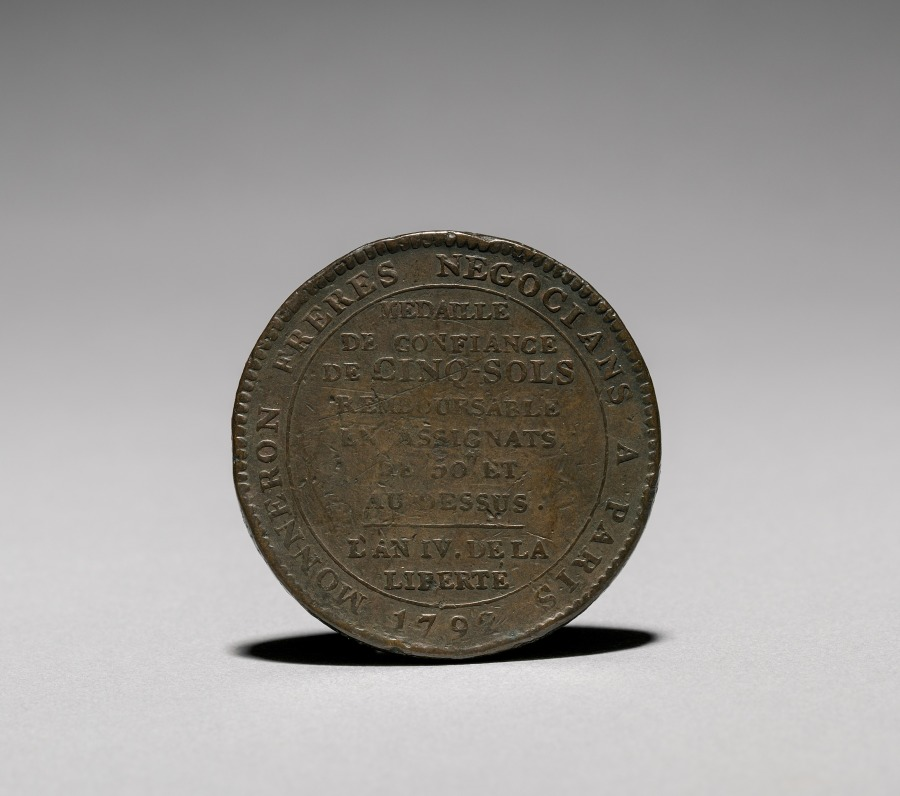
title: Medal: Five Sols issued by Monneron Brothers, Paris, 1792 (reverse)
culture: France, 19th century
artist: Jules Dupré (French, 1811–1889)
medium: bronze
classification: Metalwork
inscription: Qu mourir Vivre libres. 14 Juillet 1790.